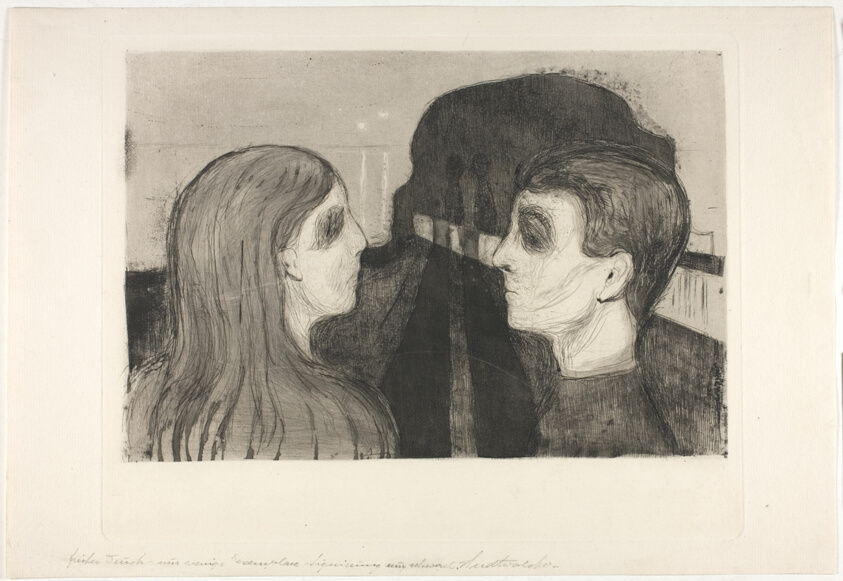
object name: Print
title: Attraction II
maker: Edvard Munch (Norwegian, 1863-1944)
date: 1895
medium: Etching with open bite and drypoint with burnishing in black ink on cream laid Arches paper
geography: Norway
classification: etching; print; prints and drawing